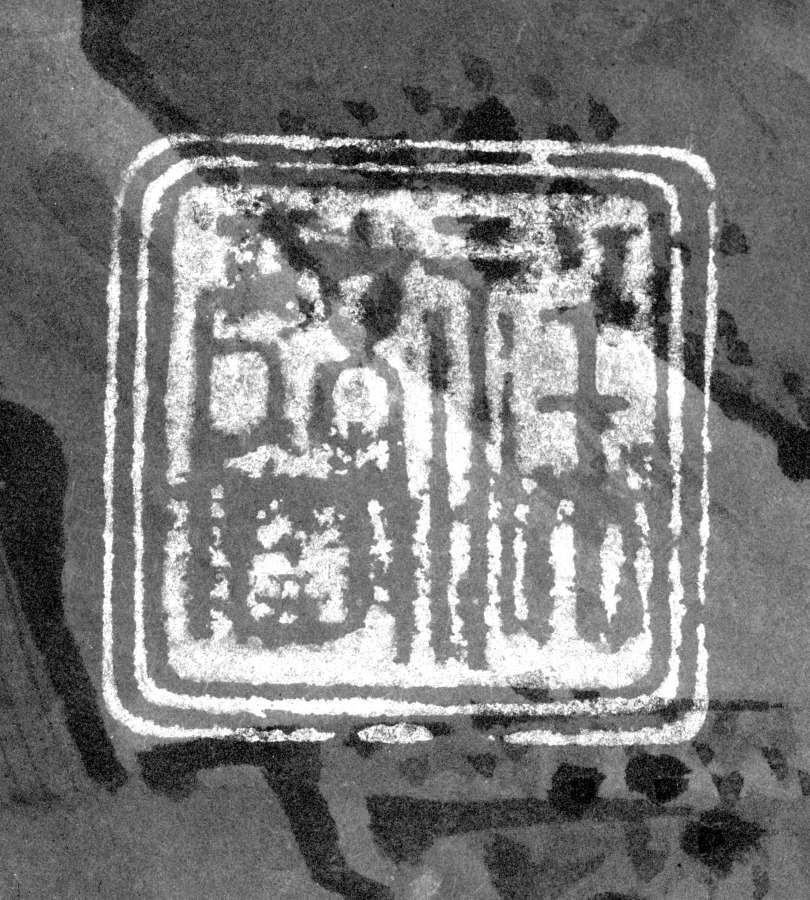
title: Returning Home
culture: Japan, Muromachi period (1392–1573)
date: mid-1500s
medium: hanging scroll, ink and color on paper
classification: Painting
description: This painting bears a seal reading Shōkei. The style of the seal resembles that used by Kenkō Shōkei (active about 1470–after 1523), a monk and painter at the Zen temple Kenchōji in Kamakura who studied in Kyoto for three years with Geiami (1431–1485?), painter to the shogun as well as curator of the shogun’s collection of art. However, the seal was carved to look like Shōkei’s and added to the painting at a later date by someone who thought the unsigned landscape was similar to his work. The painting has compositional and some stylistic similarities to images by other Kanto-based artists like Maejima Sōyū (active mid-1500s), who trained with Kano school artists. Specifically, the pines clinging to the massive boulder in front of a pavilion with mountains receding into atmospheric space—in a composition weighted in a single corner of the painting—is a Kanto-inflected derivation of the painting of the Zen monk-painter Tenshō Shūbun (active about 1414), whose work was a major inspiration for Kano school painters.